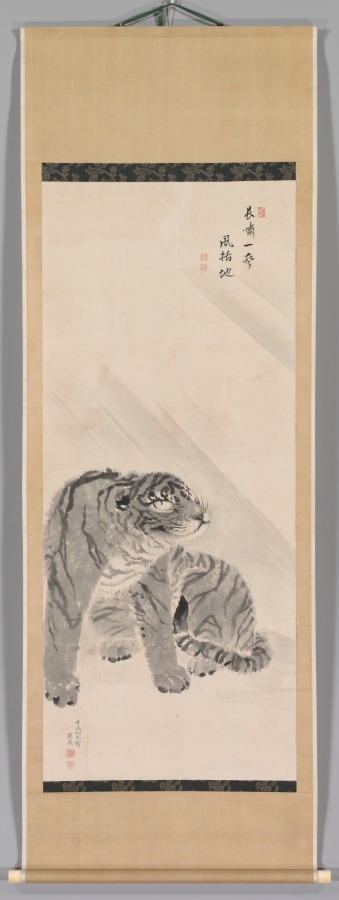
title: Tiger in Wind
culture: Japan, Edo period (1615–1868) to Meiji period (1868–1912)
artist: after Maruyama Ōkyo (Japanese, 1733–1795)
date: 1800s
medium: hanging scroll; ink on paper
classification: Painting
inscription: 「秋空一鶴」賛 長嘯一聲風括地「月渚」朱文方印「祐常之章」白文方印 壬辰初冬寫応挙 「應舉之印」白文方印・「仲選」白文方印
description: The seals appended to the inscription on this painting suggest that the text was brushed by Yūjō (1723–1773), an imperial prince who became a Buddhist monk and was abbot of Enman'in at Miidera. The line is from a poem attributed to a Yuan dynasty poet, Yu Ruyu (dates unknown), and describes the sound of a fierce wind lashing the ground. Wind is associated with the roar of the tiger. Yūjō was Maruyama Ōkyo's most important patron as a young artist, and this painting has a signature asserting that Ōkyo created it in 1772, the year before Yūjō's death. While Yūjō produced a preface for a now famous set of handscrolls he commissioned Ōkyo to paint, and a number of Ōkyo's compositions for Enman'in survive, this work would appear to be one imagining their relationship, as opposed to a genuine piece.